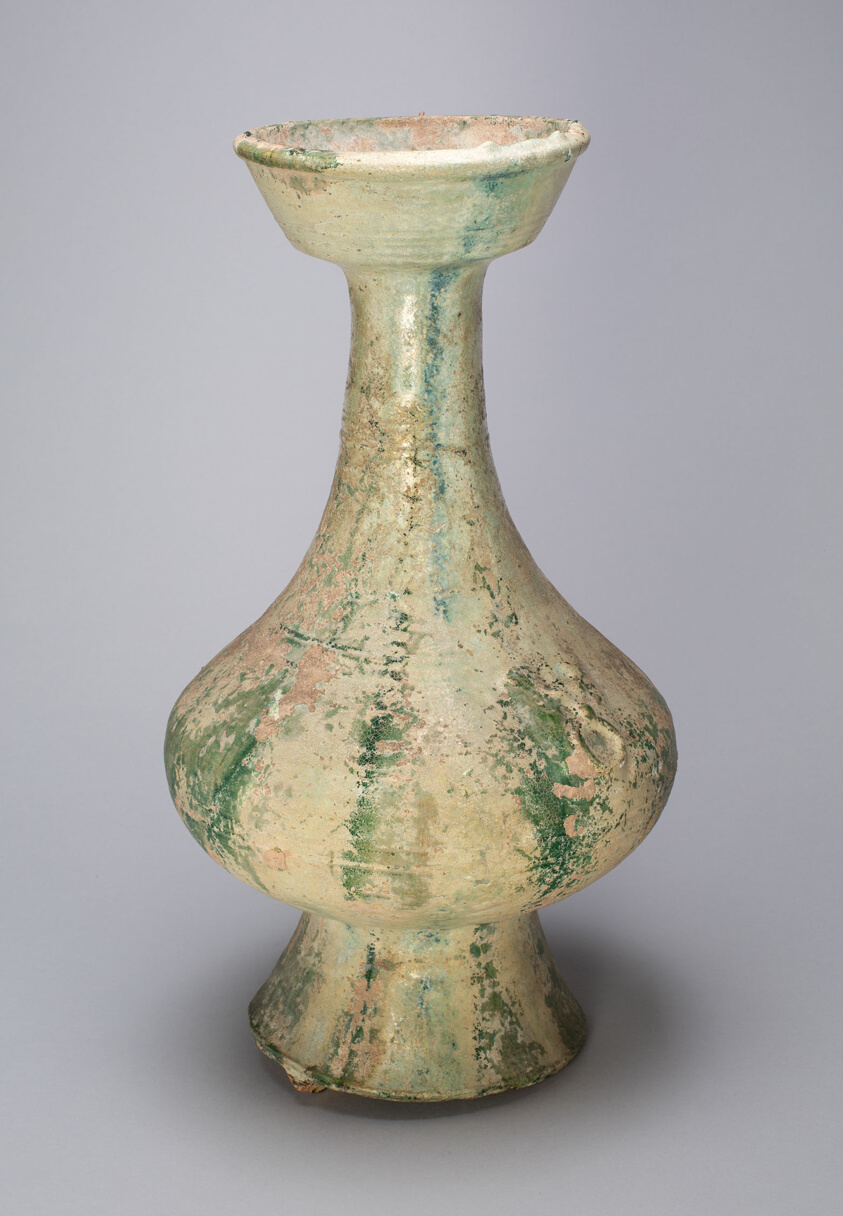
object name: Vessel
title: Bottle with Cupped Mouth and Mock Ring Handles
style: Chinese (culture or style)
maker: China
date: Eastern Han dynasty (A.D. 25–220)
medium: Earthenware with lead green glaze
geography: China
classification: earthenware; asian art; ceramics; vessel